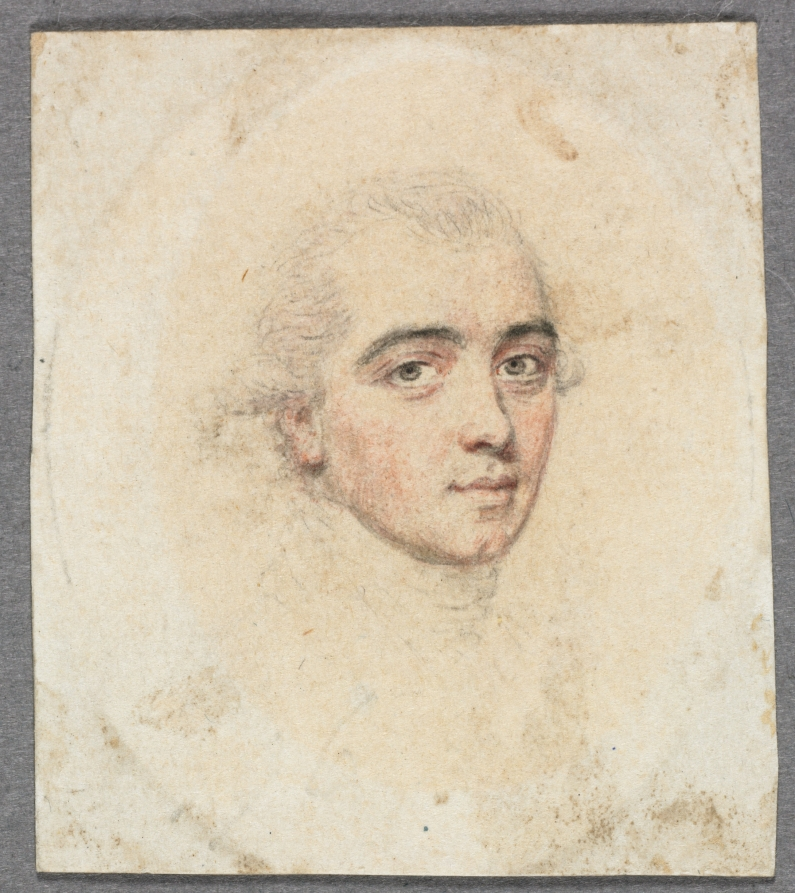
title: Portrait of M. de Viapre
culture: England, 18th century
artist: John I Smart (British, 1741–1811)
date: c. 1776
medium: graphite and wash on laid paper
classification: Portrait Miniature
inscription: Signature: none; inscribed on paper backing in graphite, upside down at upper left: 196; also on paper backing on slant at center, in graphite: Sir ?/John/Lester and 11; inscribed on back of drawing, under paper backing in graphite at bottom: Mr De [G?]iaf . . .; and in brown ink from top to bottom: Scarlet Coat . . . der Bottom [or possibly button]. . . green waistcoat . . . racelet & Spring [deli]vrd to Mr. Hall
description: Although it is impossible to say if it was always part of the artist’s process to execute a preparatory sketch prior to painting each miniature, we do know that John Smart retained many hundreds of these sketches. A group of preparatory sketches—of which this portrait is one—descended through the Smirke family after Smart’s daughter Sarah gave a sketchbook containing preparatory portrait studies to her friend Mary Smirke, sister of the celebrated Victorian architect Sydney Smirke. This book was probably broken up around 1877 when it was divided between Sydney’s daughters Mary Jemmett and Mrs. Lange, whose portions were both sold at auction in 1928. G. C. Williamson was the first to suggest that Smart’s sketches were well known and that they were preparatory studies for the painted miniatures. Williamson listed the names of sitters from the sketches known to him at the time, and they include Sir John Lester, the title formerly given to the sketch here. This designation was applied only to a paper backing that had been attached after the drawing had been removed from the sketchbook. There is no further evidence for this attribution, however. This sketch presents only the sitter’s head, with a slight suggestion of a high stock collar. His head faces to the left, and his light hair is combed straight back with a flat curl above the right ear. He has gray eyes, and the background is unpainted. The work can be dated to around 1776 because of its size, which, when painted on ivory, would have been around 2 inches high. An inscription on the back of the drawing was discovered when the paper backing was removed in 1993. It is a fragment of a larger inscription, from which it has been cut. It is partly illegible but suggests that the work was intended to be set in a bracelet, and it gives some information about how the sitter was to appear in the finished miniature, including the description “scarlet coat . . . green waistcoat.” This combination of colors might seem almost flashy, but it appears elsewhere in Smart’s work. These details seem to have been written in Smart’s hand, while the graphite inscription below—“Mr. De [?]”—was probably written later in another hand. Miniatures expert Arthur Jaffé remarked in 1948 that this portrait probably depicted John Lester of Poole, Dorset, who was knighted in 1802. However, this identity was based solely on the inscription on the later paper backing that Jaffé did not have the opportunity to see removed to reveal the inscription in Smart’s hand on the back of the drawing itself. There are no portraits of Sir John Lester known, and to this date, the finished ivory for which this preparatory sketch was presumably undertaken has not been discovered.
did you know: Sketches helped John Smart work out the particulars of a portrait before commencing the miniature on ivory; they were useful in the event that a duplicate might later be required.